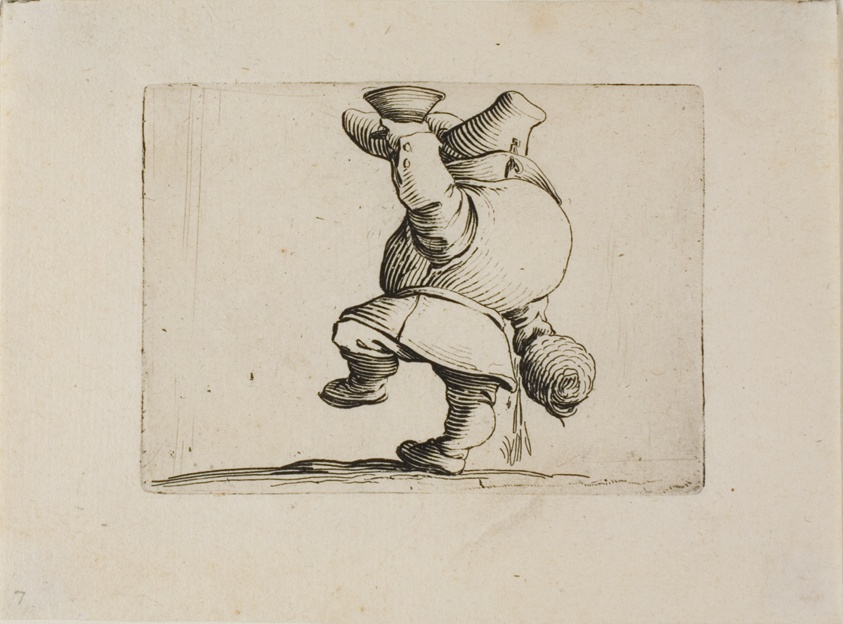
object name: Print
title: The Drinker Seen from the Back, from Varie Figure Gobbi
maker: Jacques Callot (French, 1592-1635)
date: 1616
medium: Etching on paper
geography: France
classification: etching; print; prints and drawing